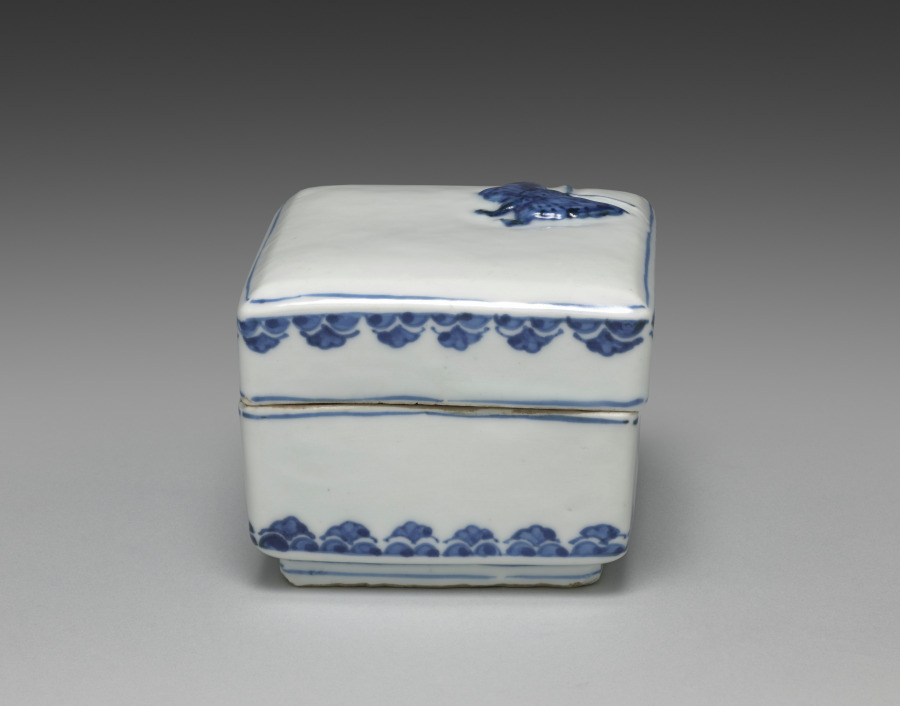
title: Box with Butterfly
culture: Japan, Meiji period (1868–1912)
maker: Seifū Yohei I (Japanese, 1801–1861)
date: 1855–57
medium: Porcelain with underglaze blue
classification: Ceramic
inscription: 清風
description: This sturdy box, with comparatively thick walls and resulting heft, is sparsely decorated with a single butterfly motif in dark underglaze blue cobalt in one corner of the lid and with repeating floral patterns along the lid and base. Single broken lines of underglaze blue define the edge of the box lid’s top where it curves to meet the sides and again where it meets the base of the box. Another blue band runs around the upper rim of the base where it meets the lip, left unglazed for a better grip of the lid when the box is closed. Yohei I’s signature on the center of the recessed base is set within a wide blue square. The porcelain box is meant to call to mind a famous story attributed to Zhuang Zhou (c. 369–286 BCE), also known as Master Zhuang, or Zhuangzi, pronounced Soji in Japanese. The second chapter of Zhuangzi, his eponymous collection of anecdotes, records the story as follows: Once, Zhuang Zhou dreamt he was a butterfly, a butterfly flitting and fluttering about, happy with himself and doing as he pleased. He didn’t know that he was Zhuang Zhou. Suddenly, he woke up and there he was, solid and unmistakable Zhuang Zhou. But he didn’t know if he was Zhuang Zhou who had dreamt he was a butterfly, or a butterfly dreaming that he was Zhuang Zhou. Between Zhuang Zhou and the butterfly there must be some distinction! This is called the Transformation of Things. The lidded box resembles kosometsuke, the porcelains in underglaze blue made to order or on speculation for the Japanese market during the early to mid-1600s in Jingdezhen, China. These works were often made from designs submitted by Japanese clients, many of whom were masters of chanoyu, who sought the wares for their tea practice. The relative roughness of the clay and the distortions in the fired object were intentional, as they created the rustic effect desired by Japanese tea communities.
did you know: It is possible that the model for this box was a smaller lidded box meant for storing incense.